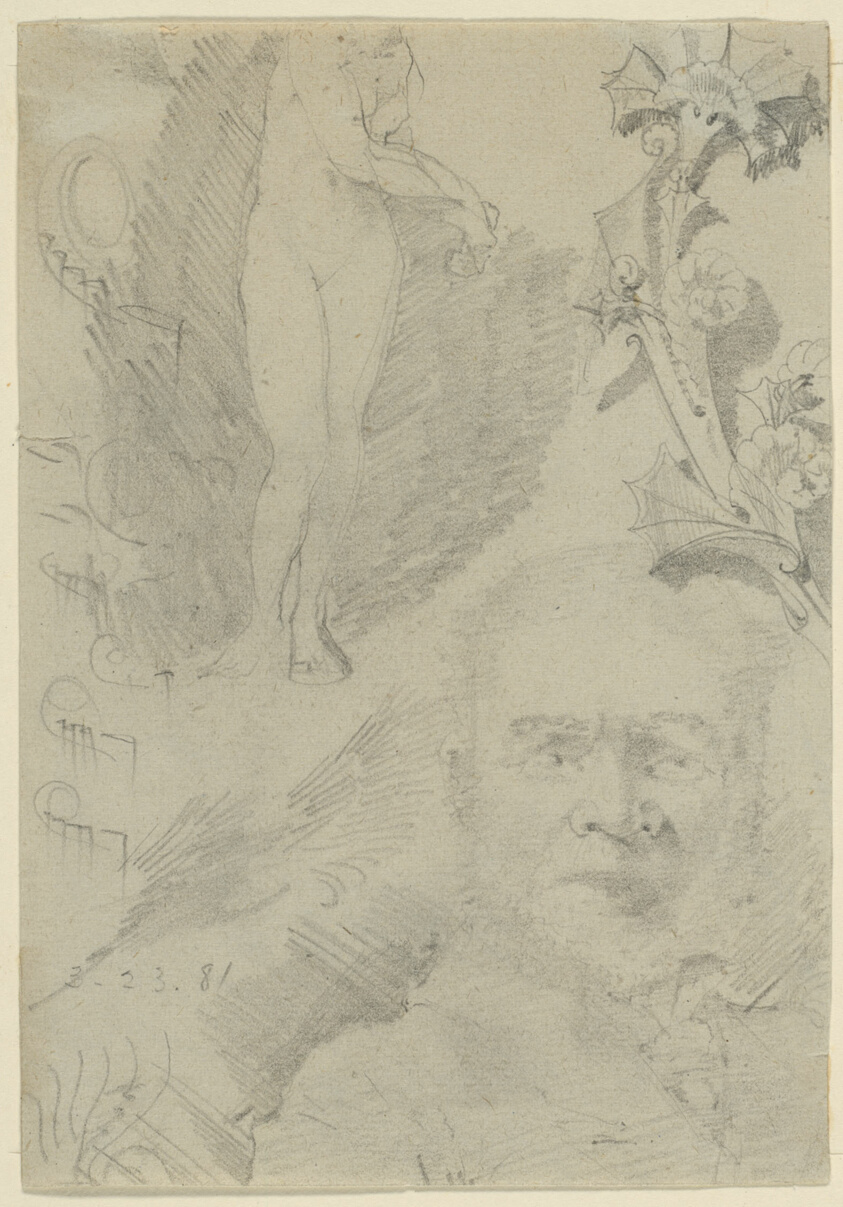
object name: Architectural Drawing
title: Multiple Sketches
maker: Louis H. Sullivan (American, 1856-1924)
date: 1881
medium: Graphite on paper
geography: United States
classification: graphite; architecture; architectural drawing